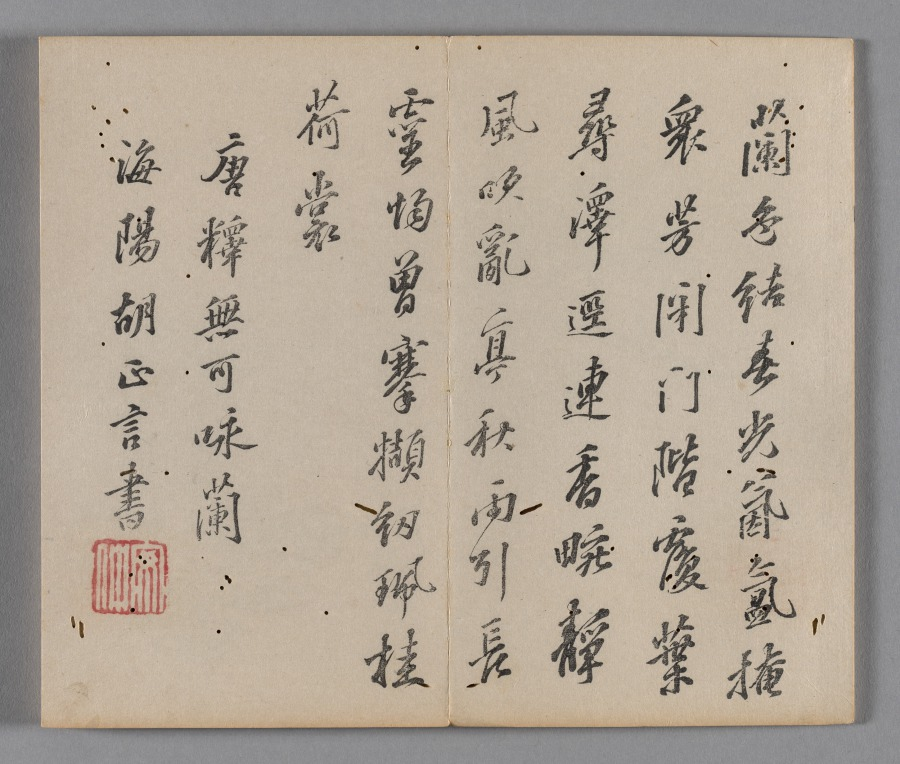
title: Ten Bamboo Studio Painting and Calligraphy Handbook (Shizhuzhai shuhua pu): Miscellaneous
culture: China, Qing dynasty (1644-1911)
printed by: Hu Zhengyan (Chinese, c. 1584–1674)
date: 1633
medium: Woodblock-printed book; ink and colors on paper; first edition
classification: Print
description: Color printing reached a level of perfection in the early 1600s, as seen in this Ten Bamboo Studio Collection of Calligraphy and Painting and the Mustard Seed Garden Manual of Painting (printed 1679 and 1701). The painterly quality, precision in registering (aligning) the woodblocks, and harmonious colors made them the most successful color print editions in Chinese history. Both editions were printed and compiled in Nanjing, spread nationwide, and had a great impact on the arts in Japan and Korea.